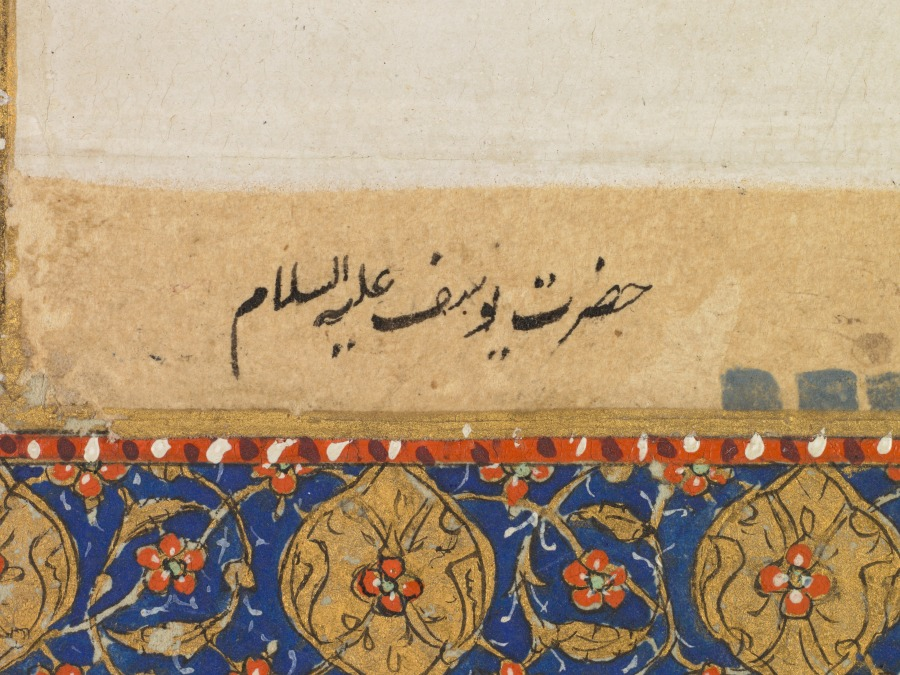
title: The Dream of Zuleykha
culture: India, Lucknow, Mughal, 18th century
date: c. 1770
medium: Gum tempera and gold on paper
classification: Painting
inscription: verso: inscribed at lower left: Hazrat Yusuf alayhi al - salaam ("the prophet Joseph on him be peace")